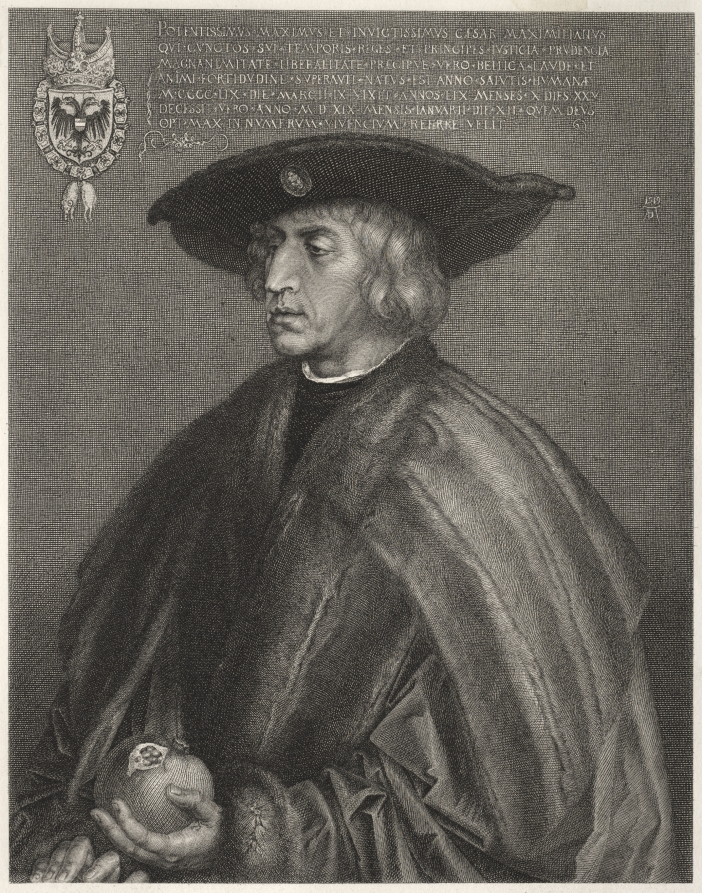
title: Maximilian I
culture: Germany, 19th century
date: 1800s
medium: engraving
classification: Print